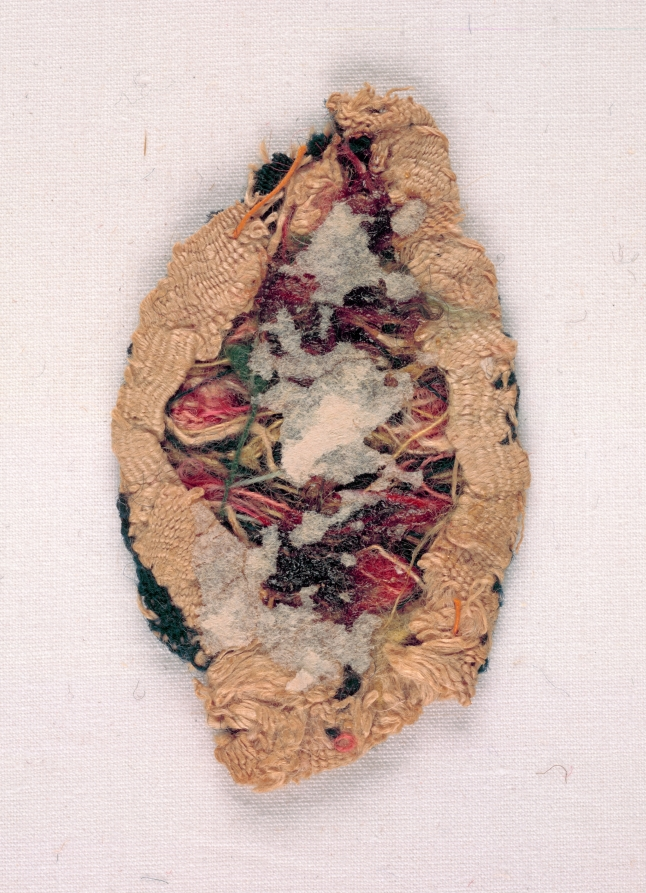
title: Pendant of a Clavus (?)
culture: Egypt, Byzantine period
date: 300s–500s CE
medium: tapestry weave: wool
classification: Textile